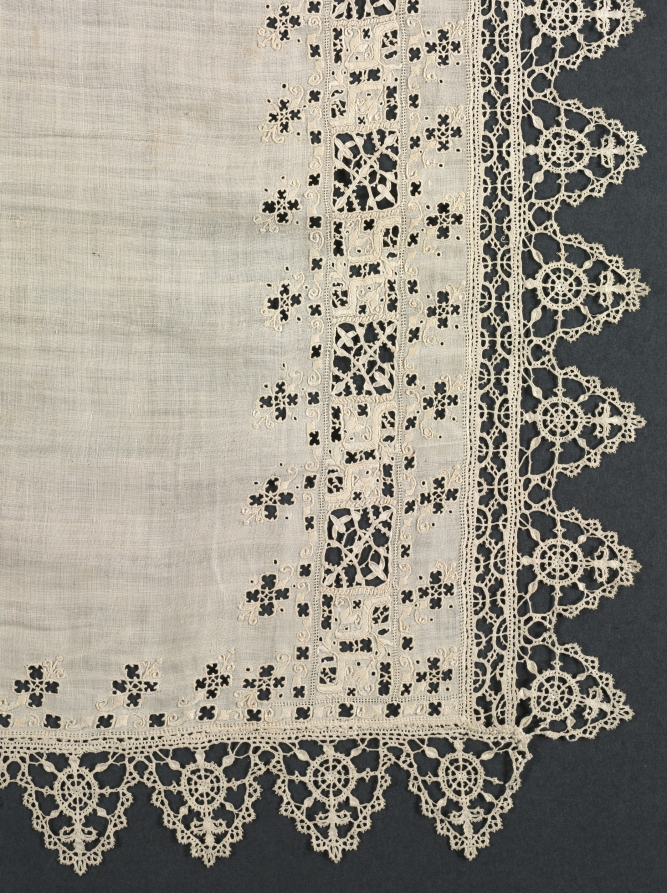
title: Altar Frontal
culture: Italy, Genoa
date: 1500s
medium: Linen: needle lace (cutwork) and bobbin lace edging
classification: Lace